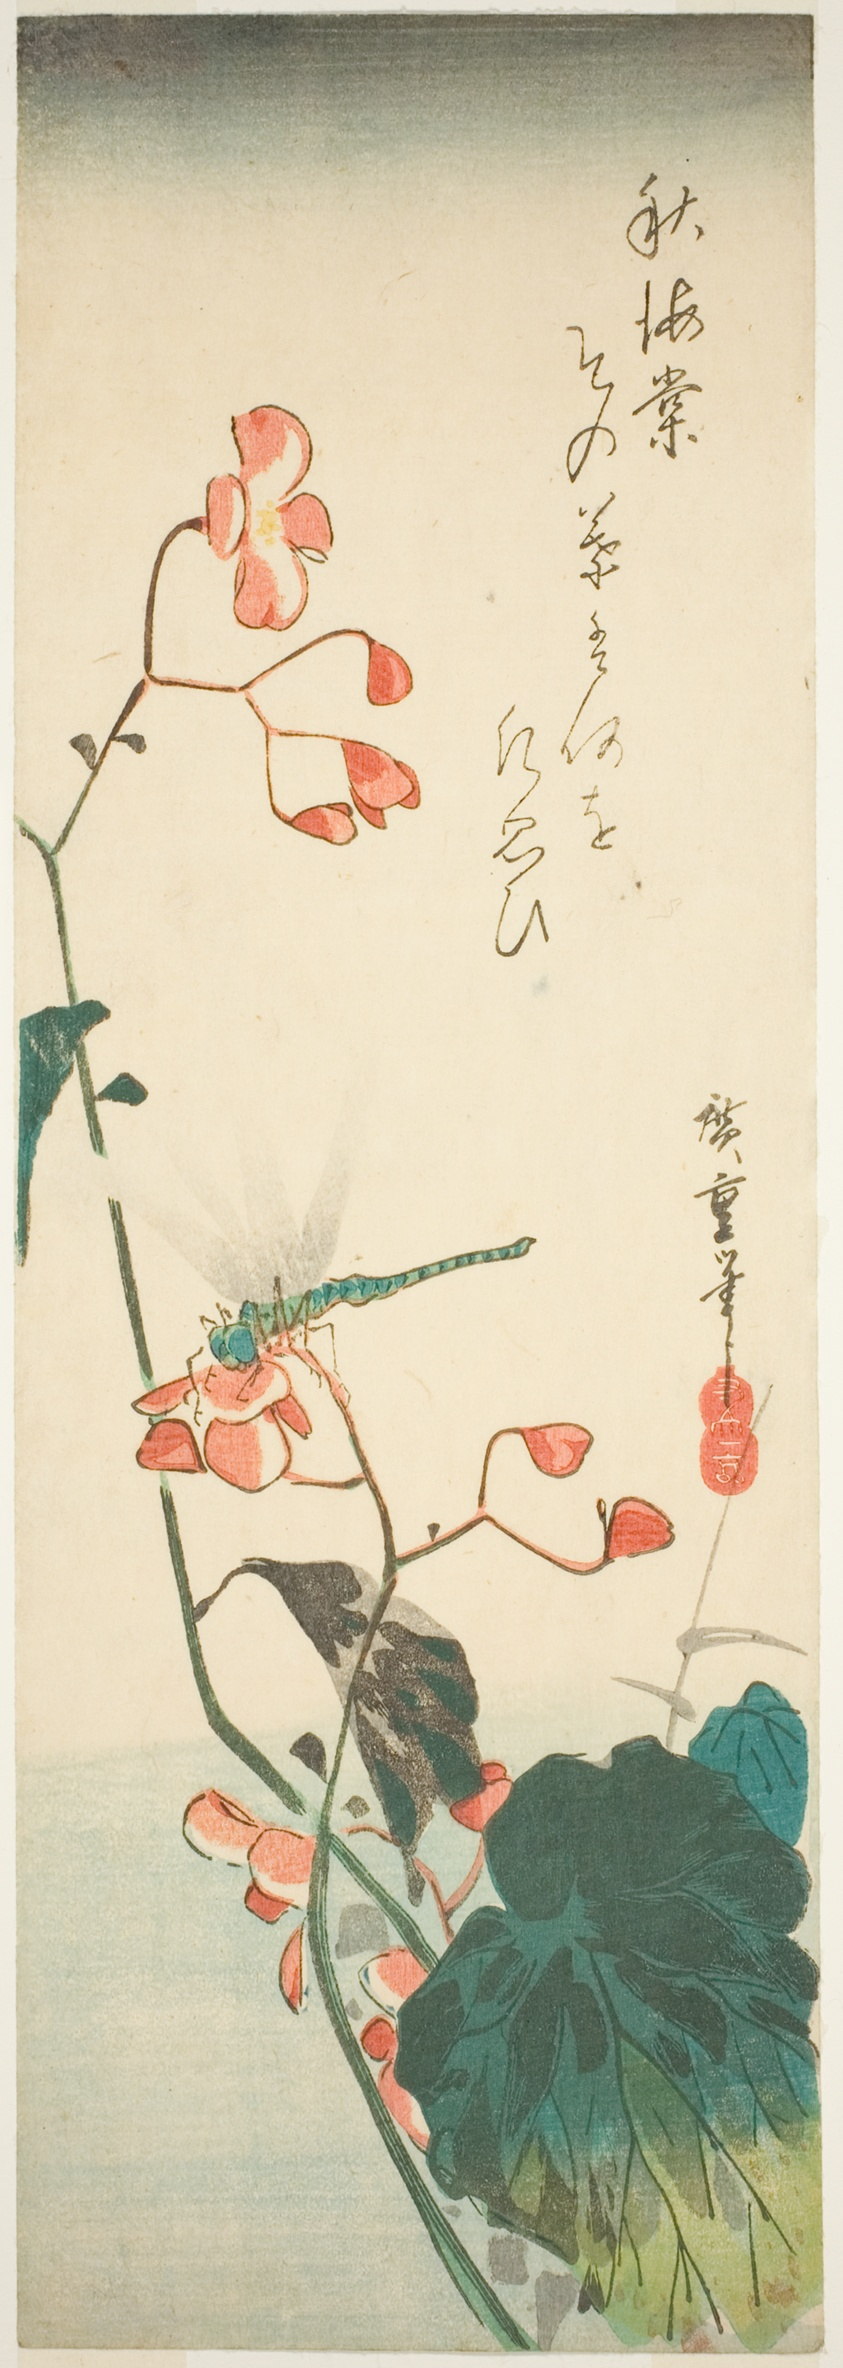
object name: Print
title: Dragonfly and begonia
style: Japanese (culture or style)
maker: Utagawa Hiroshige 歌川 広重; Japanese, 1797-1858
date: 1830s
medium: Color woodblock print; chutanzaku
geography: Japan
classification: print; asian art